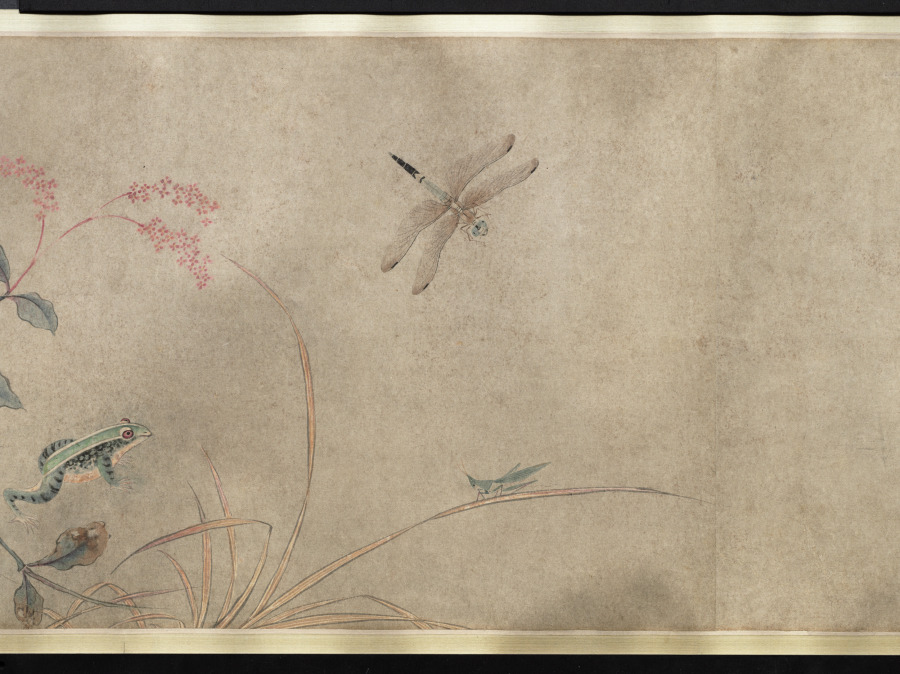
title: Insects and Flowers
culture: China, Qing dynasty (1644-1911) or Republican period (1912-49)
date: c. 1900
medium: Handscroll, ink and color on paper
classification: Painting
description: More than 26 feet long, this scroll presents insects, reptiles, and plants in delicate brushwork and pale colors, referring in style to earlier Southern Song dynasty (1127–1279) bird-and-flower paintings. Upon closer inspection, ants dismember a butterfly and reptiles wait to ambush their prey. An inscription at the end of the painting gives us an idea of its meaning: Attributed to the Qing dynasty scholar Zhang Xigeng (張錫庚, 1801–1861), the inscriber relates the work to an earlier painting by Qian Xuan (錢選, c. 1235–before 1307) and further suggests that the painting may allude to the relentlessness of natural selection. By drawing a parallel to tumultuous episodes in Chinese history, the writer might even hint at the domestic rebellions and the aggression of Western powers against China in his lifetime, particularly the Opium Wars (1839–60).